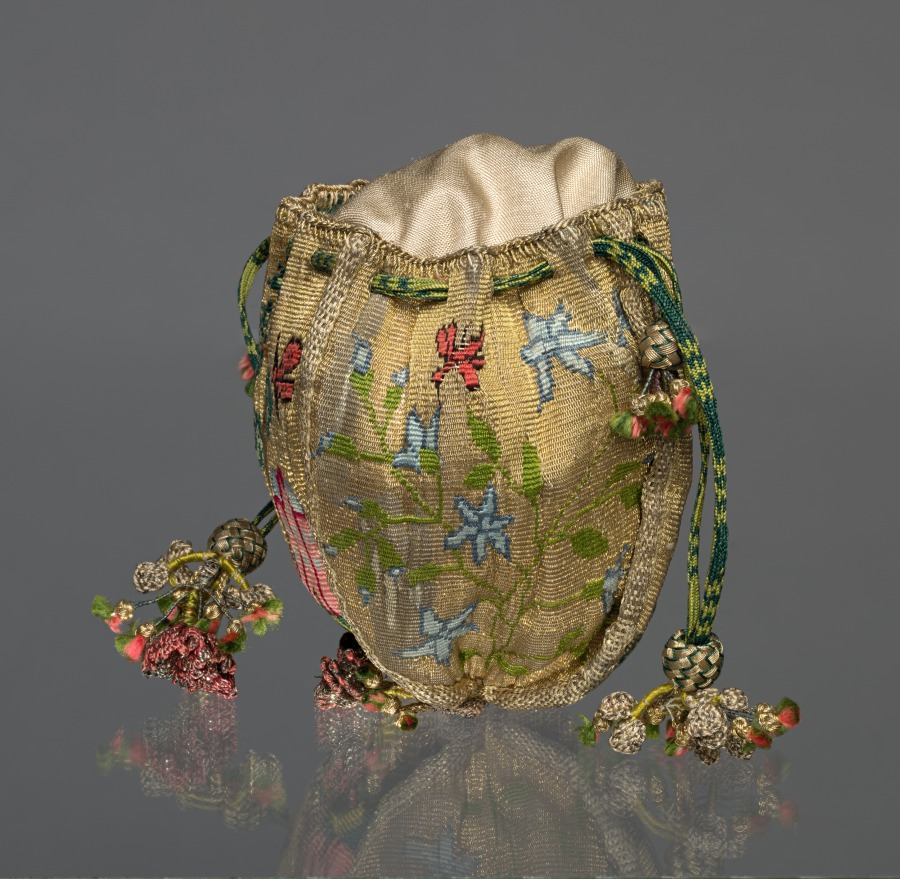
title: Woven Purse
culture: France, 18th century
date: 1700s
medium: tapestry, silk and gold thread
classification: Garment